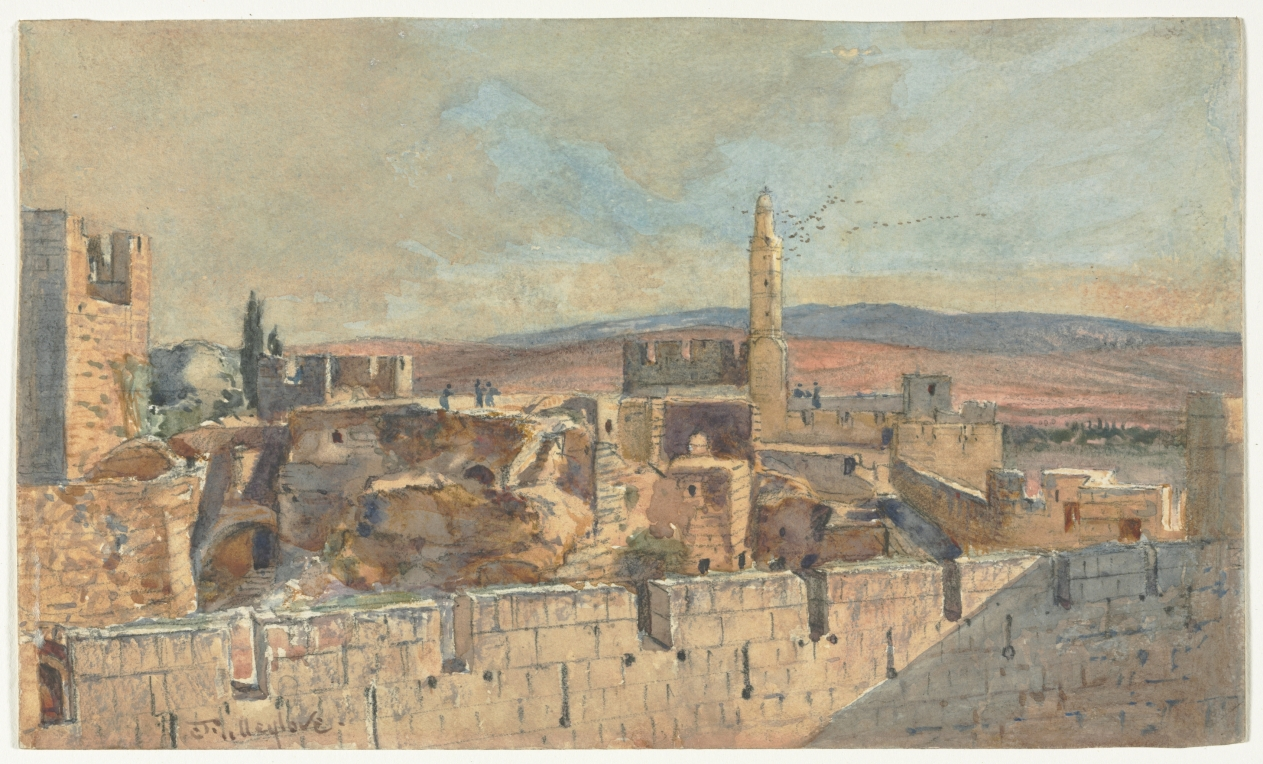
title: View of the Old City of Jerusalem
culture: England, 19th century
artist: John Fullylove (British, 1845–1908)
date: 2nd half 1800s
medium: watercolor over black chalk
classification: Drawing